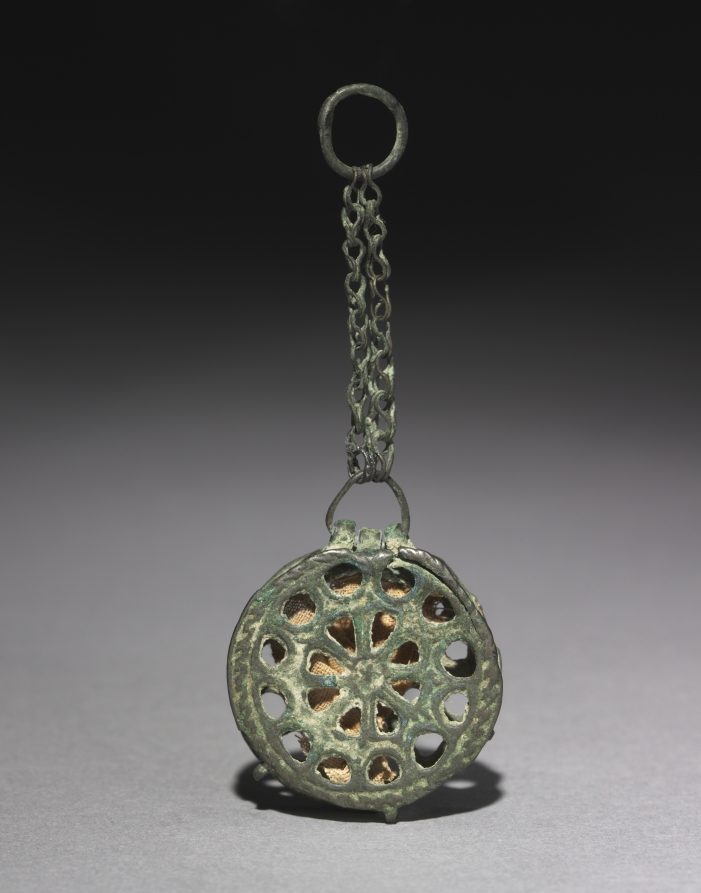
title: Phylactery (Reliquary Penant)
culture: Byzantium, Egypt or Syria, early Byzantine period, 6th-8th centuries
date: c. 500–700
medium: copper alloy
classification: Metalwork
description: Made in the 500s, this Byzantine phylactery, or personal reliquary, was meant to be worn around the neck on a chain. It is fashioned of bronze and still contains its original linen-wrapped relic.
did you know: This was gifted to the museum in memory of Robert P. Bergman, former director of the museum and medievalist.